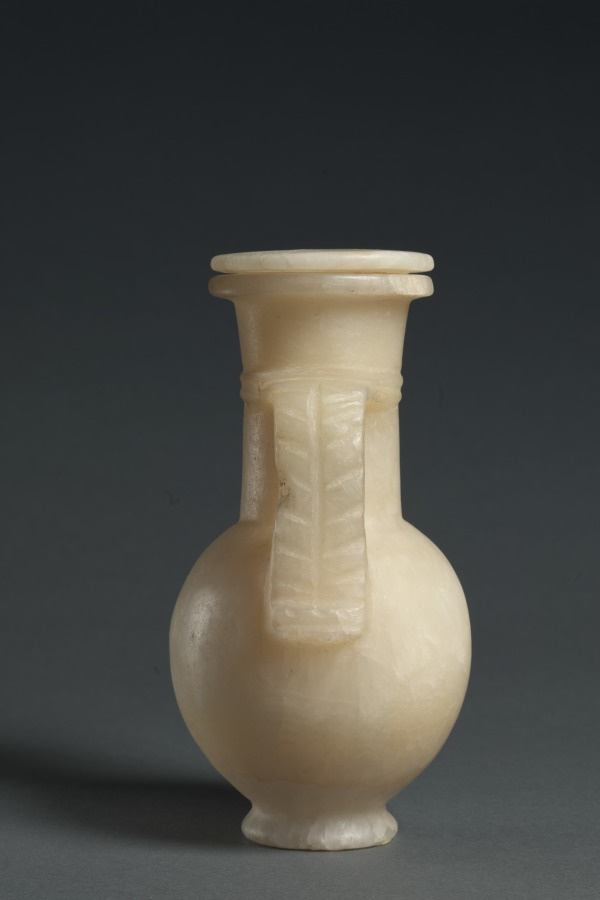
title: Long-Necked Flask with Strap Handle and Lid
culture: Egypt, New Kingdom (1540–1069 BCE), Dynasty 18, reign of Tuthmosis III (1479–1425 BCE)–reign of Amenhotep III (1390–1352 BCE)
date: 1401–1353 BCE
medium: travertine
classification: Vessels